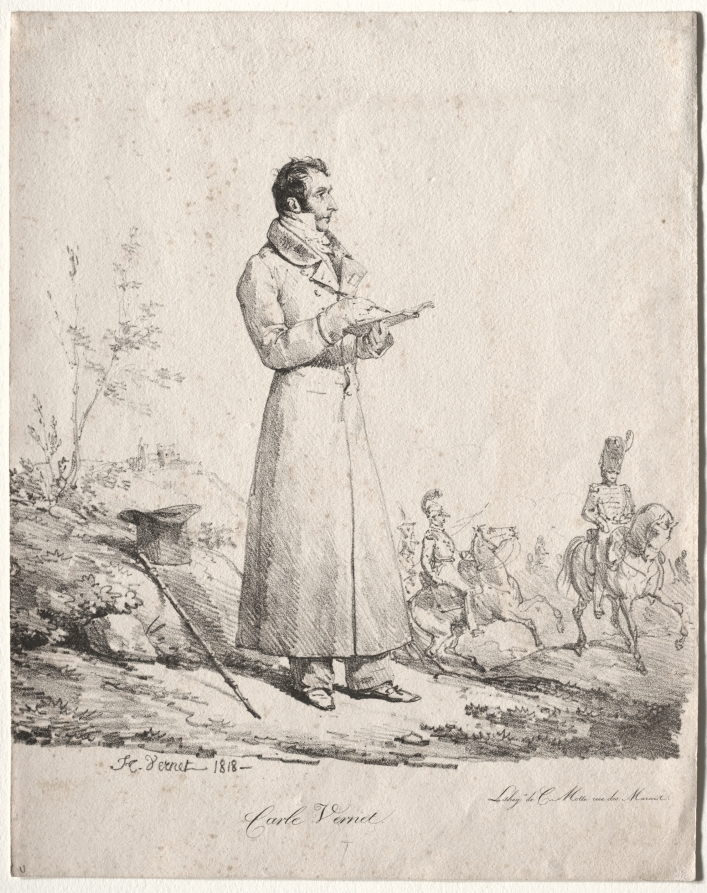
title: Antoine Charles Horace Vernet, called Carle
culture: France, 19th century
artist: Horace Vernet (French, 1789–1863)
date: 1818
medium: lithograph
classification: Print